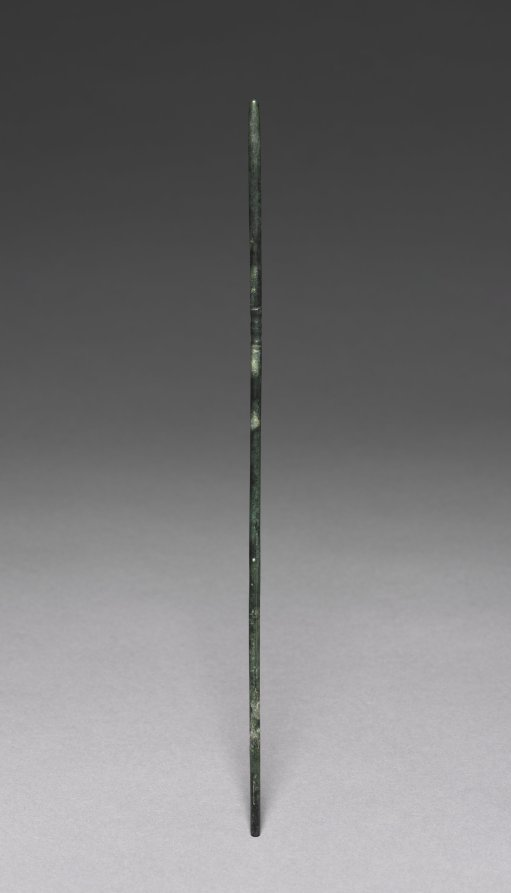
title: Chopstick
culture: Korea, Goryeo dynasty (918–1392)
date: 918–1392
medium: bronze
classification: Metalwork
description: In Korea, chopsticks made of metal such as brass, silver, and gold were excavated from ancient tombs and ruins dated to the 6th century at the earliest. Burial goods often include utilitarian objects such as table wares and utensils because the dead were believed to need them in the afterlife.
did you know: In contrast to the Chinese and Japanese, Koreans still prefer metal chopsticks (stainless steel and brass) to wooden ones.